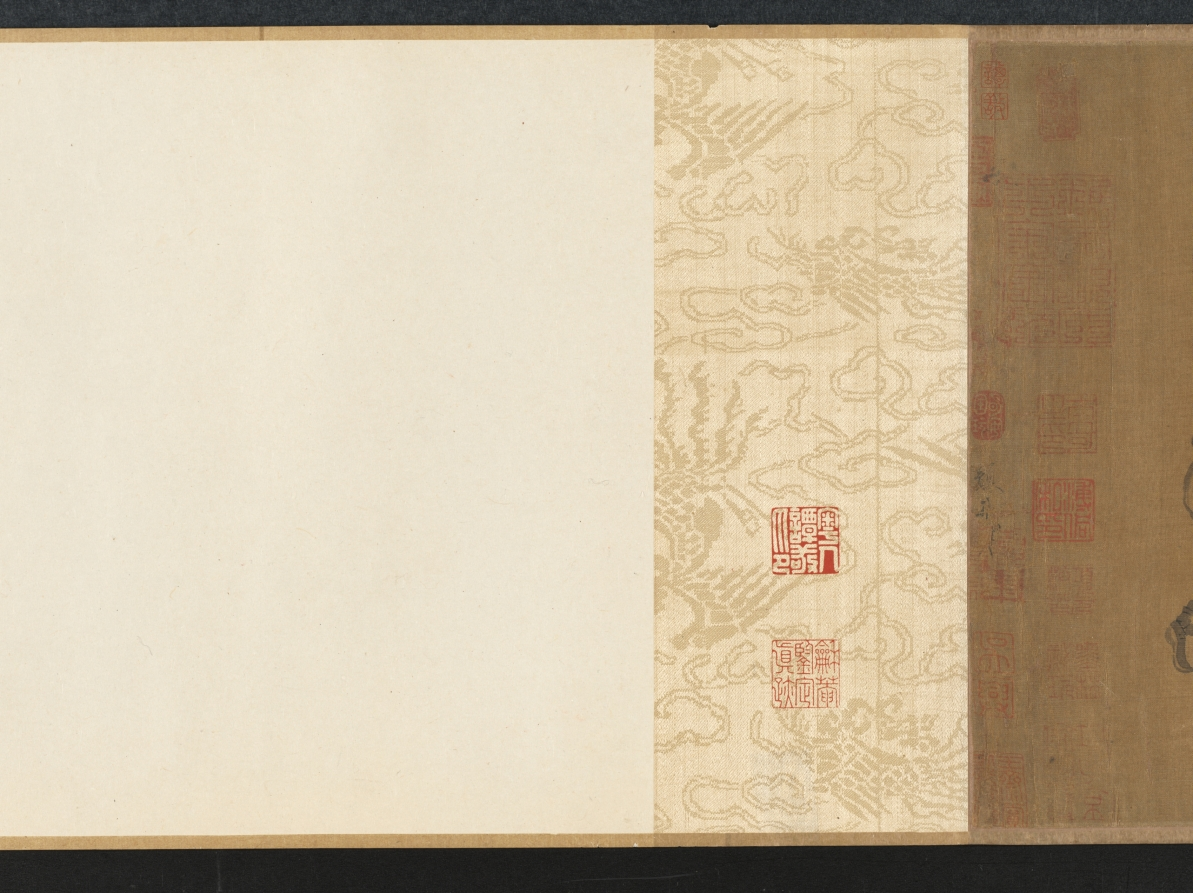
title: The Lantern Night Excursion of Zhong Kui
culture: China, Yuan dynasty (1271-1368)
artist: Yan Hui (Chinese, active 1270–1310)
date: late 1200s–early 1300s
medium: handscroll; ink and slight color on silk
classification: Painting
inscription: Artist's signature [and probable seal]: Yan Qiuyue 顏秋月 Title on frontispiece and 1 seal of Niu Shuyu 鈕樹玉 (1760–1827): Qiuyue mohuan 秋月墨幻 [Qiuyue's Ink Fantasy]. 31 additional seals: 2 of Yang Shiqi 楊士奇 (1365–1444); 2 of An Guo 安國 (1481–1534); 8 of Xiang Yuanbian 項元汴 (1525–1590); 2 of Geng Zhaozhong 耿昭忠 (1640–1686); 4 of Pu Tung 溥侗 (1870–1952); 7 of Tan Jing 譚敬 (1911–1991); 1 of Liu Ting-chih (20th c.); 5 unidentified.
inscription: An inscription by Zizhi Shanren 紫芝山人 [probably Jiang Hui 蔣惠], dated 1389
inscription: An inscription by Wu Kuan 吳寬 (1436–1504)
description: Here, the demon queller Zhong Kui leads a nightly procession of street entertainers with bare, muscular bodies and demonic faces. Some wear shabby clothes, and all perform stunts and tricks to astound and scare the viewer. In fact, a New Year custom in cities of southeast China had the poor, disguised as demons, process through the streets and play their tricks to clear households of evil spirits and welcome the spring. From right to left, a demonic figure leads the procession and beats a drum; another lifts a large rock; one stands on his hands trying to drink; one balances a jar on his elbow; three hold and wield weapons; one carries a folded chair covered by a cow’s skin; another holds Zhong Kui’s qin (zither), books, brush, and inkstone. At the end of the scroll, two figures offer a cup and bottle of wine to Zhong Kui, who lifts his hand in command.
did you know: Zhong Kui was an ancient ghostbuster.